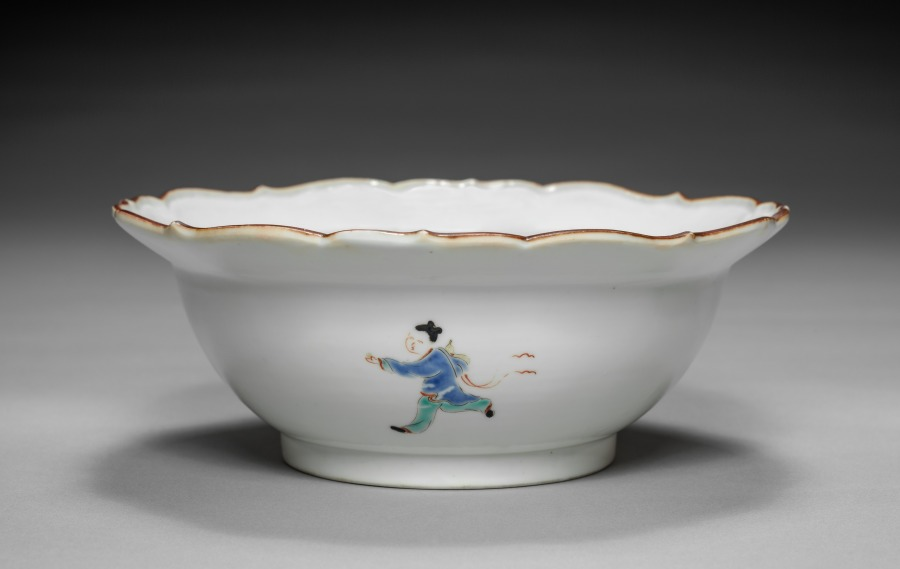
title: Deep Bowl with Dragons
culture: Japan, Edo period (1615–1868)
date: 1700s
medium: porcelain with overglaze color enamel and molding (Hizen ware, Kakiemon type)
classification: Ceramic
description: Graced with energetic dragons amid clouds, this deep bowl has a petal-shaped rim. The coiled position of the dragon in the center and the chasing action of those on the sides contribute to a sense of circular motion. The exterior shows a running figure and two birds in flight, echoing the movement in the interior.